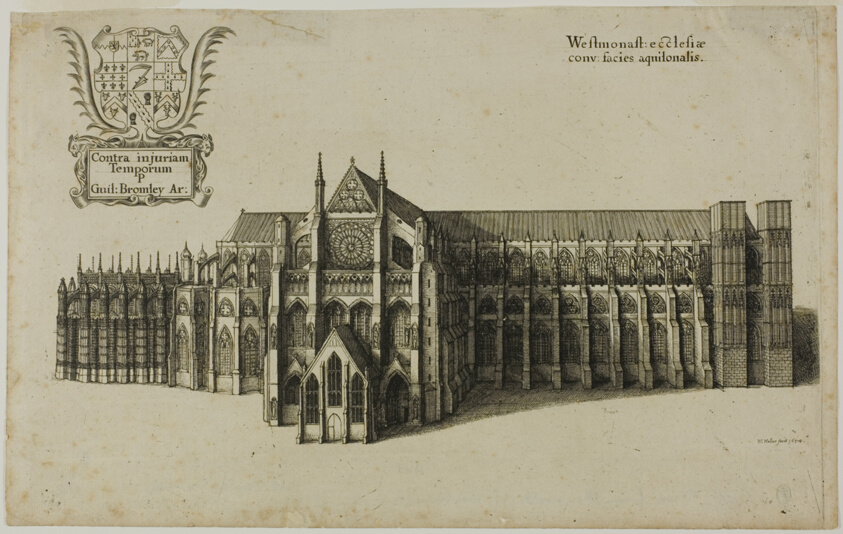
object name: Print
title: View from the North Westminster Church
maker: Wenceslaus Hollar (Bohemian, 1607-1677)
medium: Etching on paper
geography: Bohemia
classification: etching; print; prints and drawing